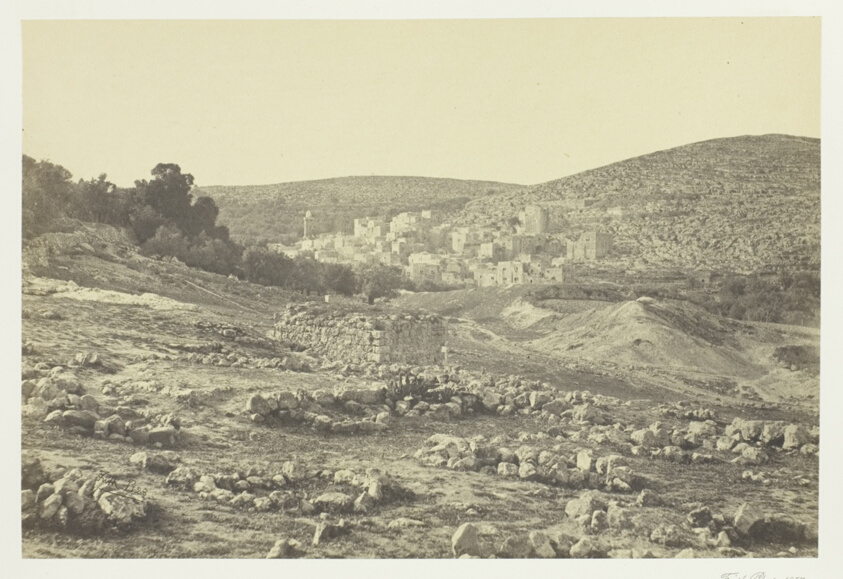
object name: Photograph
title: View at Hebron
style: 19th century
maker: Francis Frith (English, 1822–1898)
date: 1857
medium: Albumen print, pl. 18 from the album "Egypt and Palestine, Volume I" (1858)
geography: England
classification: photograph; albumen silver print; photography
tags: Collected by Hugh Edwards, Egypt and Palestine